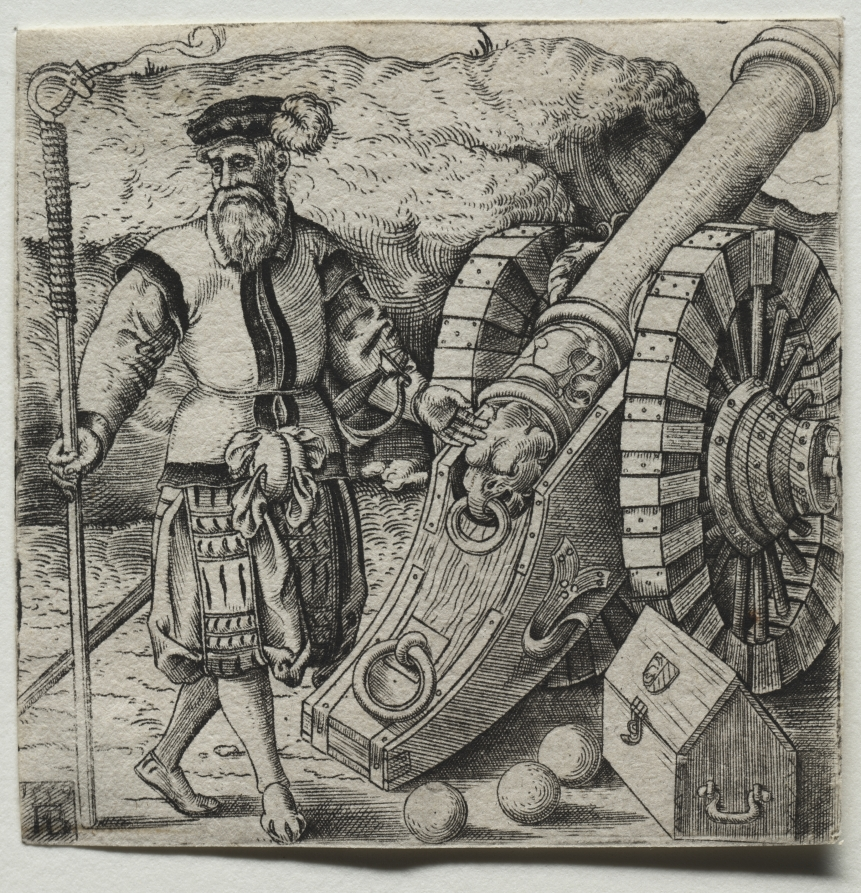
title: The Gunner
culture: Germany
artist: Franz Brun (German)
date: 1559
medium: engraving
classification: Print